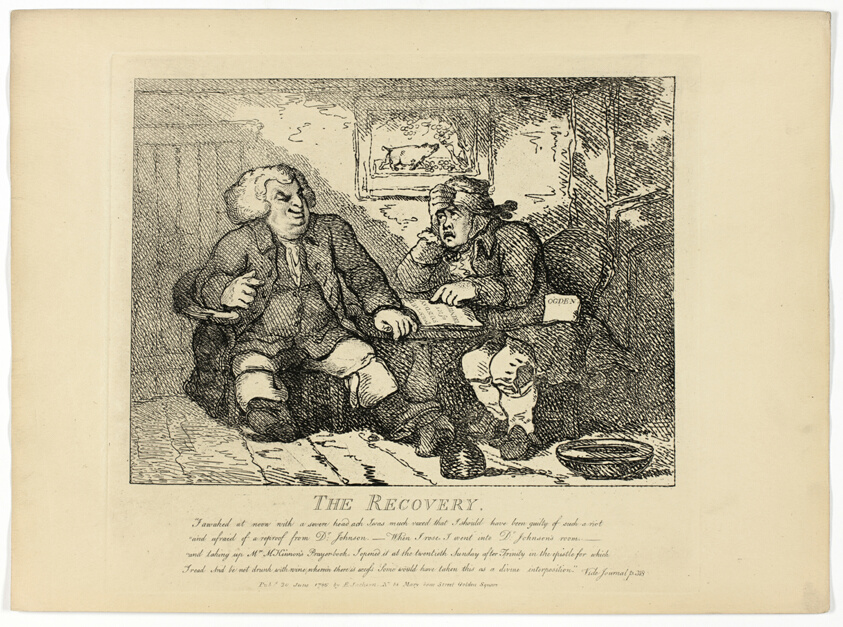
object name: Print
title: The Recovery, from Boswell's Tour of the Hebrides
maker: Thomas Rowlandson (English, 1756-1827)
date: 1786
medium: Etching on paper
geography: England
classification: etching; print; prints and drawing